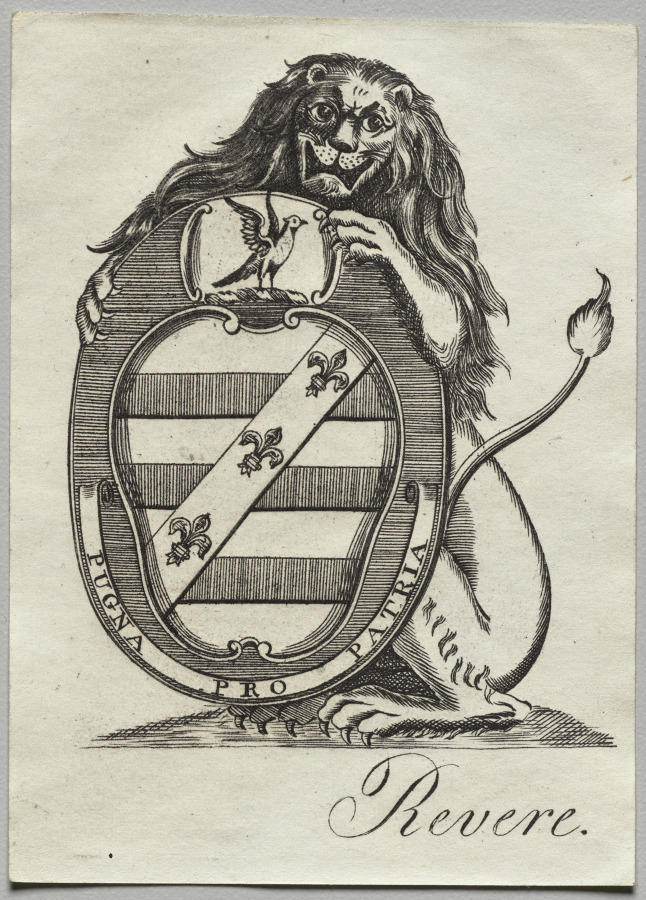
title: Bookplate: Coat of Arms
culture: America, Massachusetts, Boston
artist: Paul Revere II (American, 1735–1818)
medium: engraving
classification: Print